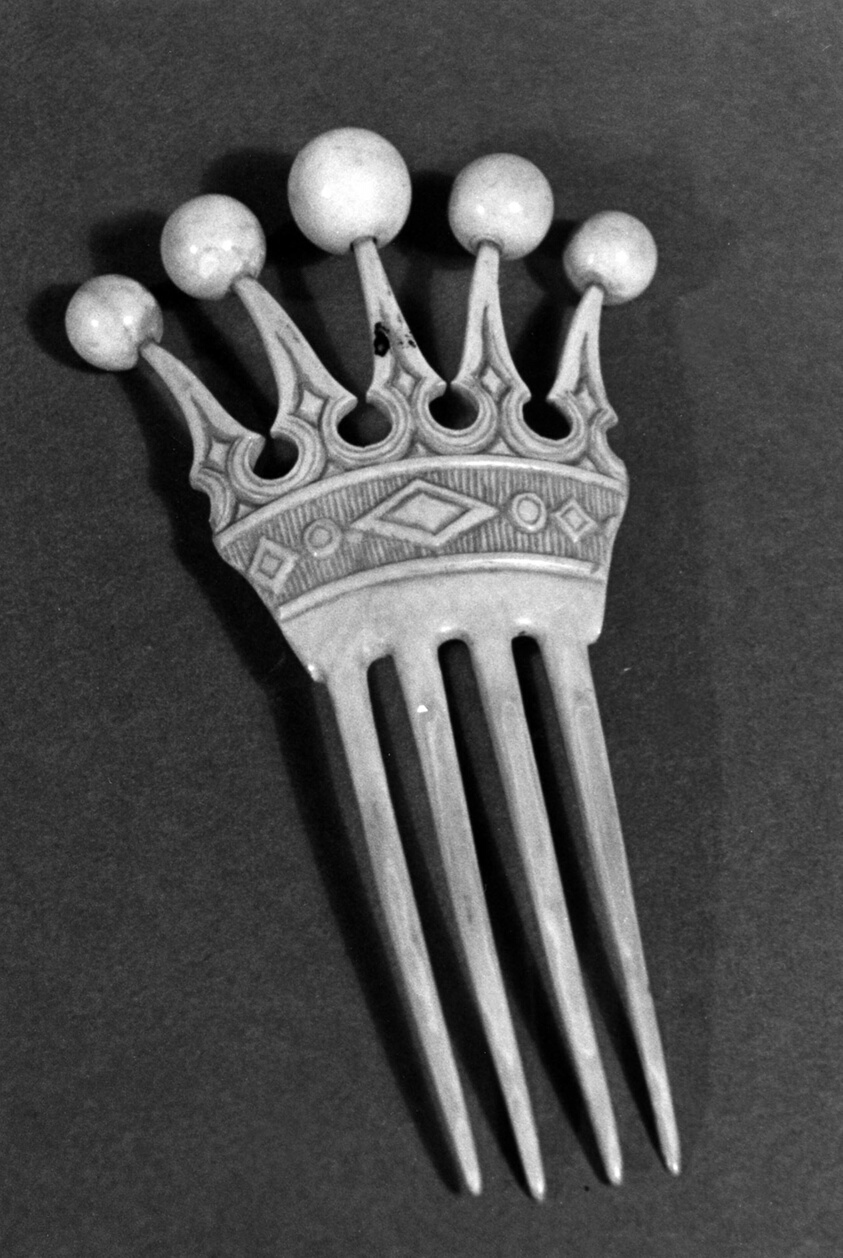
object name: Costume and Accessories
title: Comb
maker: Europe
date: 19th century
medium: Ivory, carved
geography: Europe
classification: textile; costume accessory - comb; costume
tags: fashion